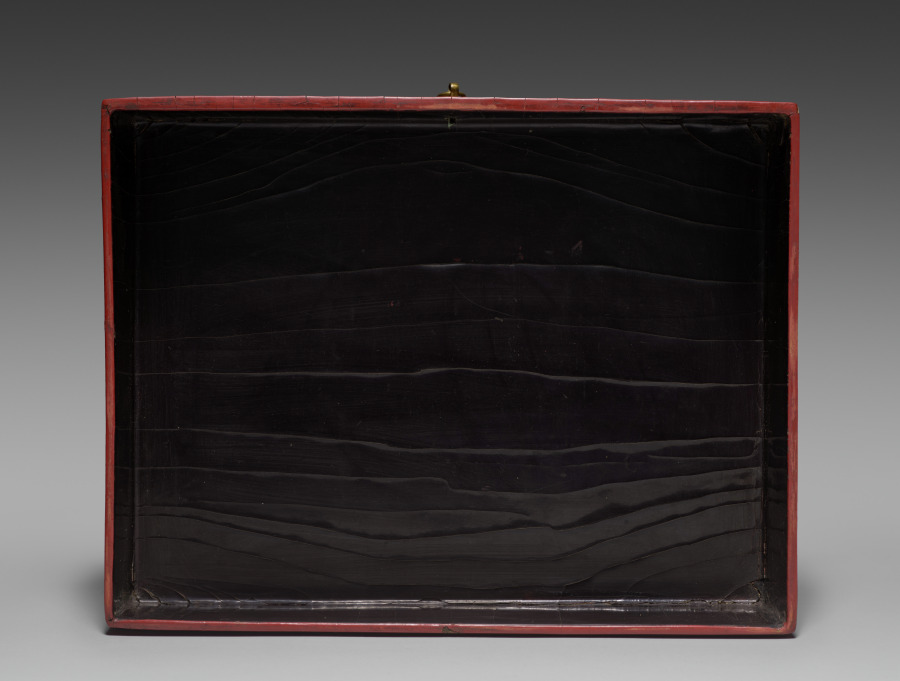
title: Drawer for a Tihong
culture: China, Ming dynasty (1368-1644), Wanli reign (1572-1620)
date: 1585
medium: carved cinnabar lacquer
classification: Lacquer